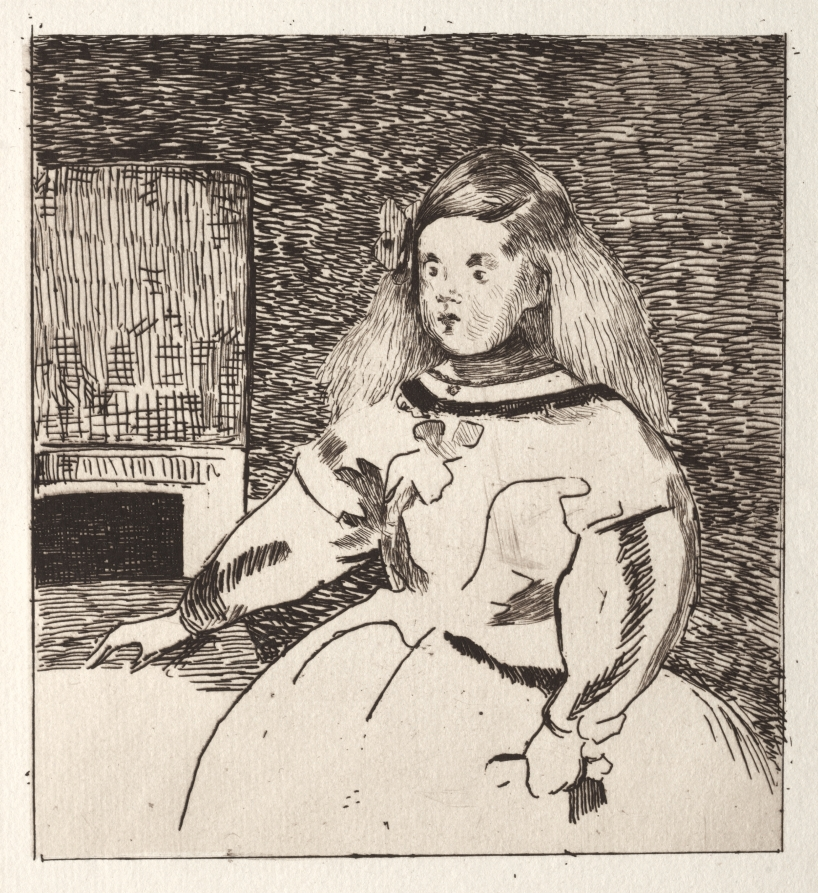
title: L'infante Marguerite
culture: France, 19th century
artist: Édouard Manet (French, 1832–1883)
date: 1861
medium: etching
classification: Print